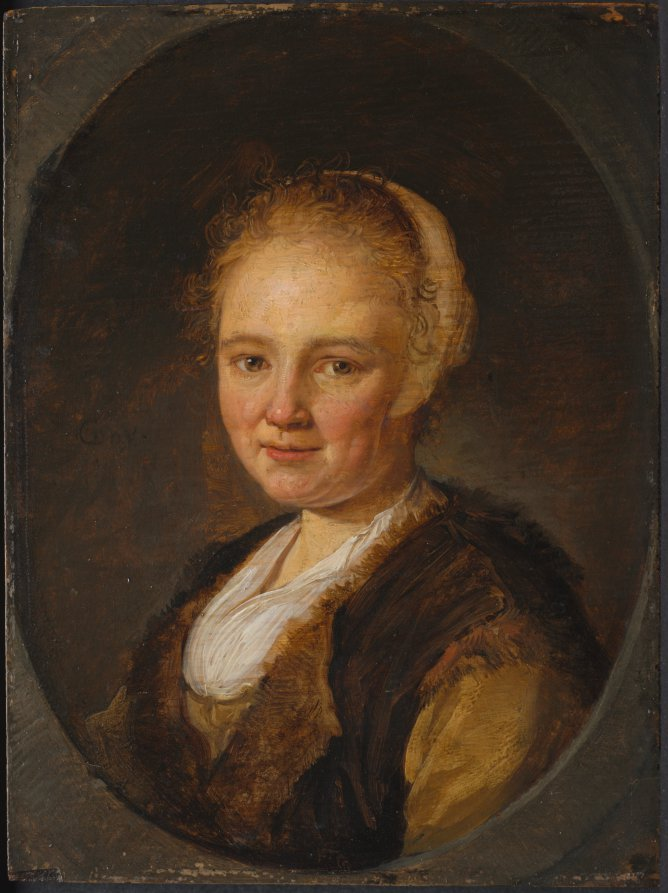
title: A Young Woman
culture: Netherlands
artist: Gerrit Dou (Dutch, 1613–1675)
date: 1640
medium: oil on wood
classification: Painting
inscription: Signed left center: "GDov."; "[GD in monogram]"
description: This painting may depict a specific person as in a traditional portrait. The less formal costume and the tight focus on the head, however, may mean that it is a tronie, a popular category of painting among Dutch painters in the 1600s. While painted from living models, tronies represent more general types of people, designed as beautiful images rather than accurate likenesses of people known to their patrons.